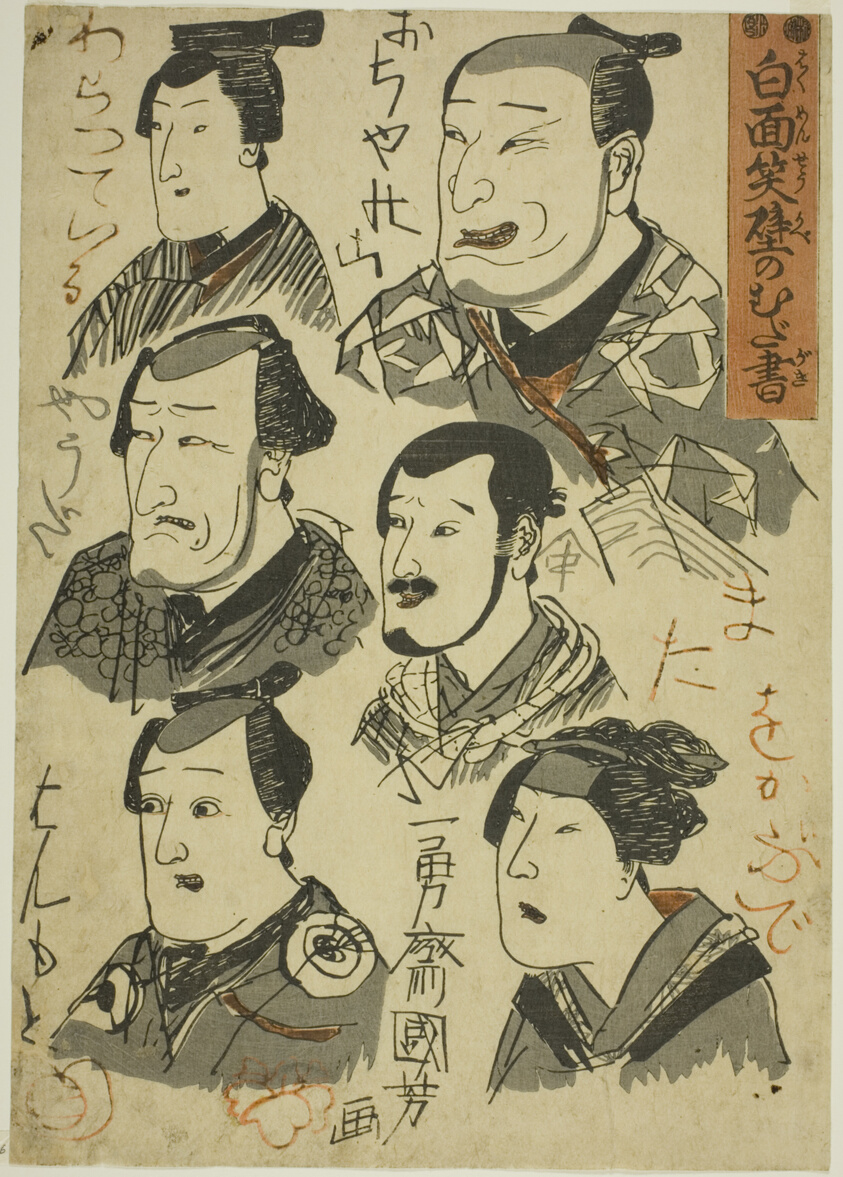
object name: Print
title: Caricatures of Laughing Actors Scribbled on a Wall (Hakumensho kabe no mudagaki)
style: Japanese (culture or style)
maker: Utagawa Kuniyoshi (Japanese, 1797-1861)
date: c. 1848/51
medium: Color woodblock print; center sheet of oban triptych (right: 1975.474, left: 1975.475)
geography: Japan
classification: woodblock print; print; asian art